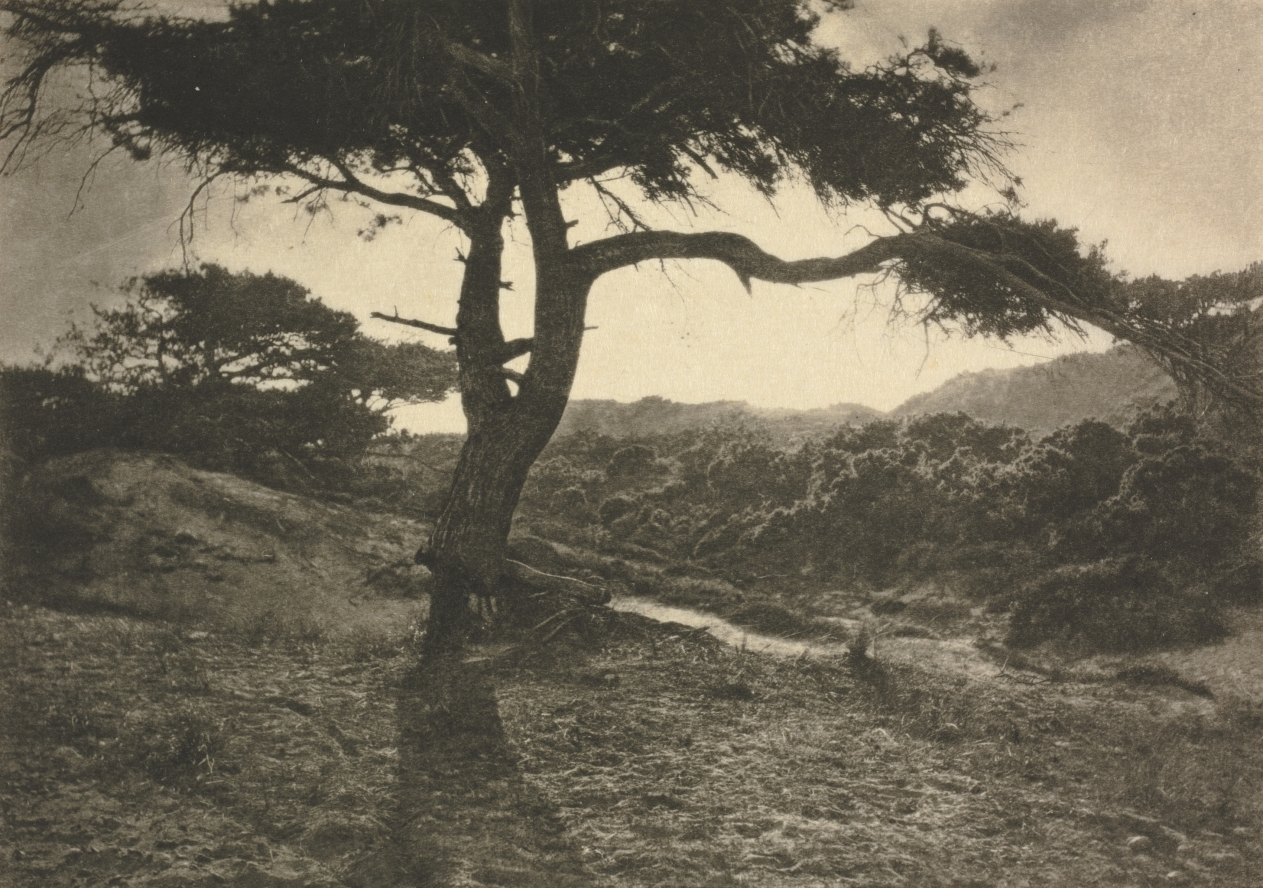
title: Camera Work: The Long Arm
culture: England, 20th century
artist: George Davison (British, 1856–1930)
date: 1907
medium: photogravure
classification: Bound Volume